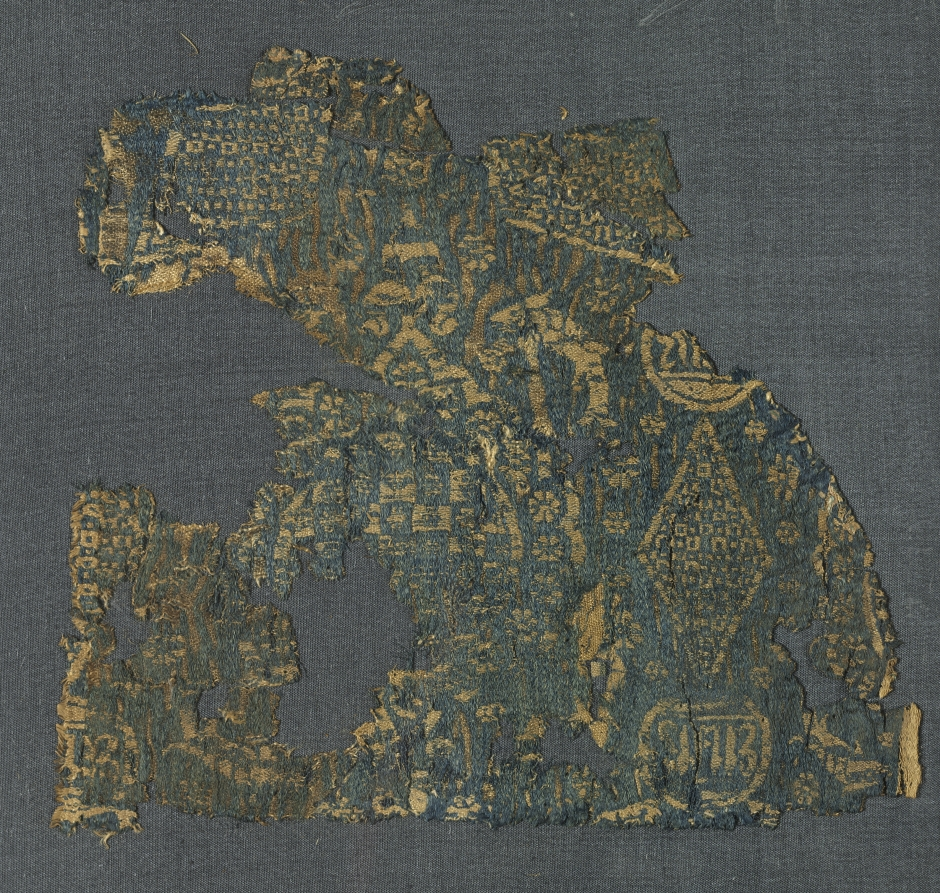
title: Fragment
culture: Egypt or Syria, Mamluk period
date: 1300s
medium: lampas weave, silk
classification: Textile